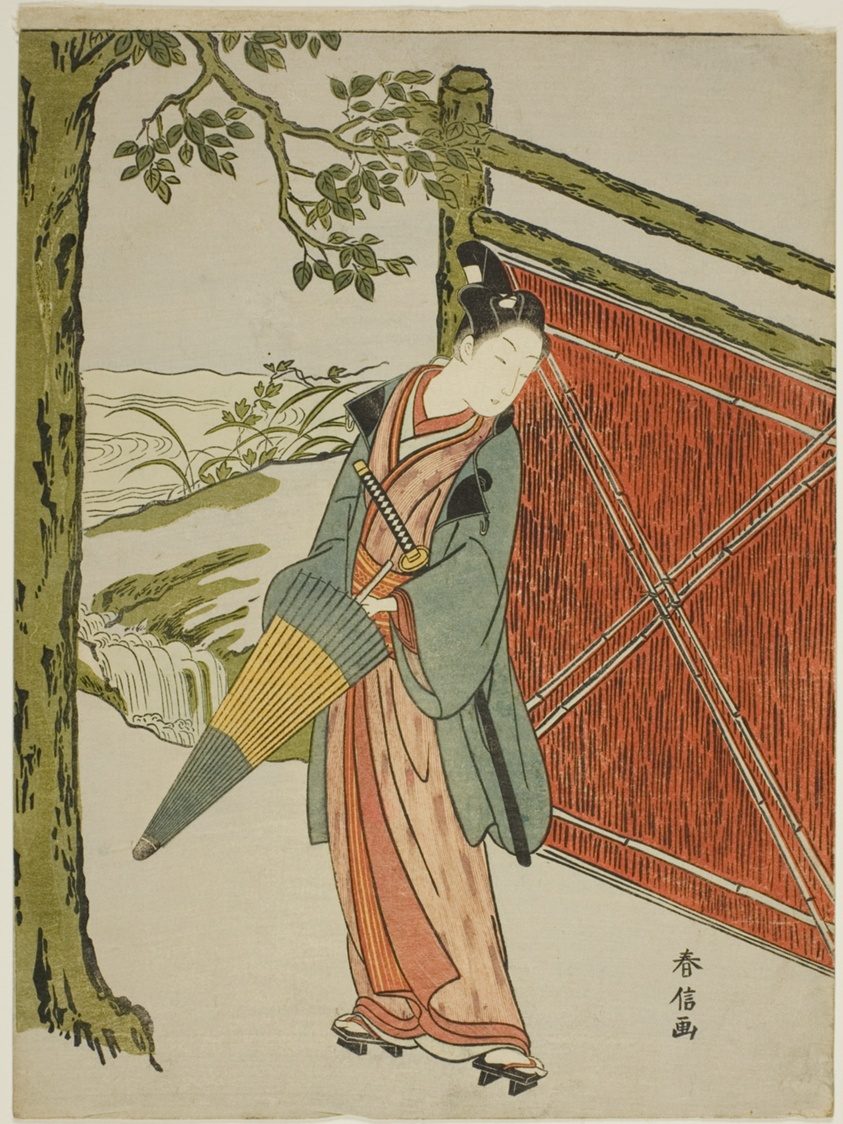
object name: Print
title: Young Man Holding Umbrella Beside a Fence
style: Japanese (culture or style)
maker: Suzuki Harunobu 鈴木 春信; Japanese, 1725 (?)-1770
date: c. 1767/68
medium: Color woodblock print; chuban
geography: Japan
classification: woodblock print; print; asian art